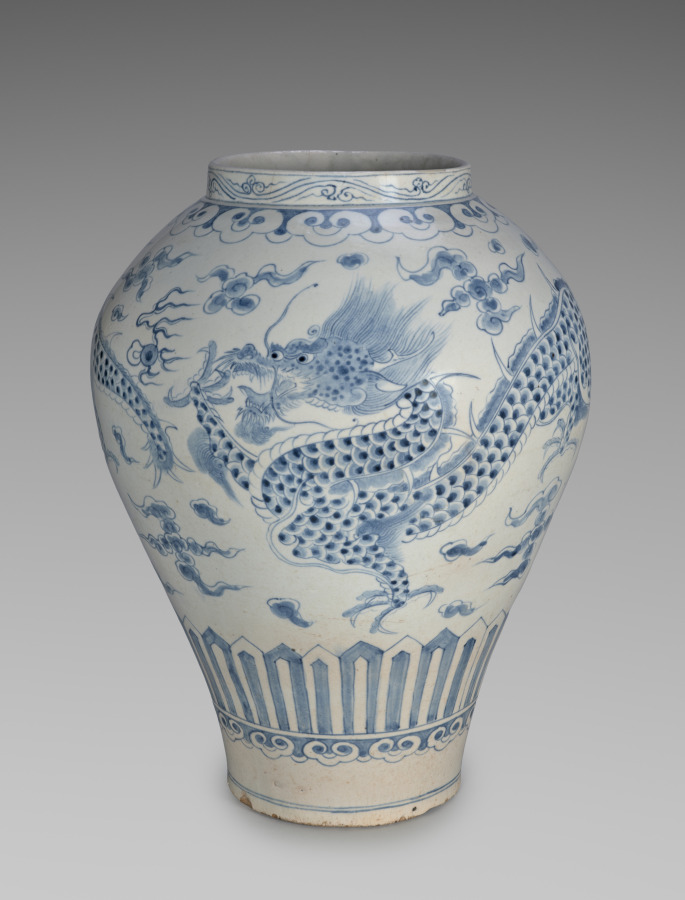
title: Jar with Dragon Design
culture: Korea, Joseon dynasty (1392–1910)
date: 1700s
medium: porcelain with underglaze blue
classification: Ceramic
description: As a mythical creature believed to make rain, the dragon served as a symbol of rulers in premodern East Asia. Here, a cobalt blue dragon is depicted flying through clouds to catch a flaming, wish-granting jewel called a cintamani. In the royal court, the shorter type of dragon jar held wine, while the tall type, like this one, held flowers. This porcelain once belonged to Robert W. Moore, who developed an interest in Korean art while serving in the US Army in South Korea during the 1950s and 1960s. Later, the CMA acquired this important work through an auction sale in 1986.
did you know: A mythical creature believed to have the power to make rain, the dragon is a prominent symbol of rulers in premodern East Asia; the image of dragons was used exclusively for the king's paraphernalia.